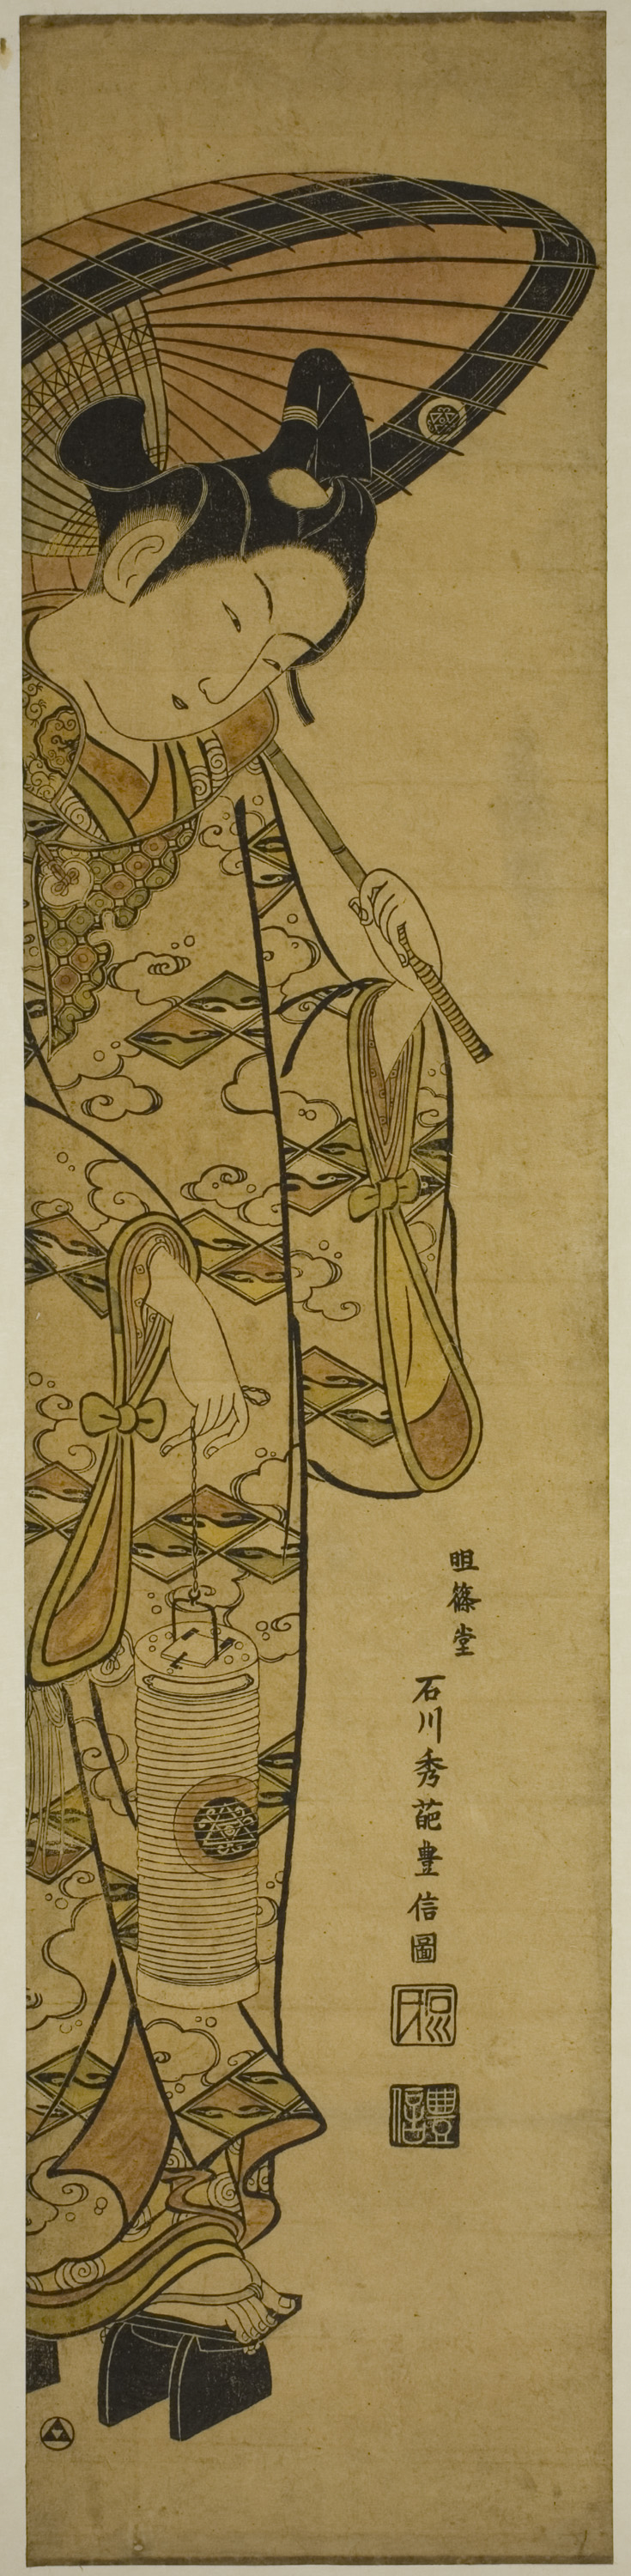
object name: Print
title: Youth Carrying a Lantern and an Umbrella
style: Japanese (culture or style)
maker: Ishikawa Toyonobu (Japanese, 1711-1785)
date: 1740s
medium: Hand-colored woodblock print; hashira-e, beni-e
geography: Japan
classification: woodblock print; print; asian art